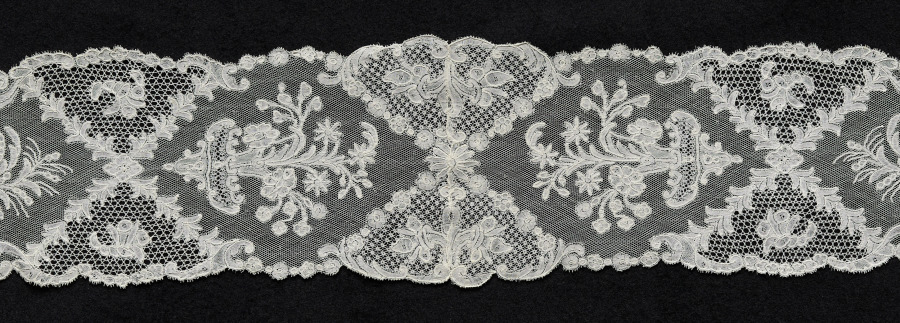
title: Lace Lappet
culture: Belgium, Brussels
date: 1700s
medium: Linen: bobbin lace (Point d'Angleterre)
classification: Lace